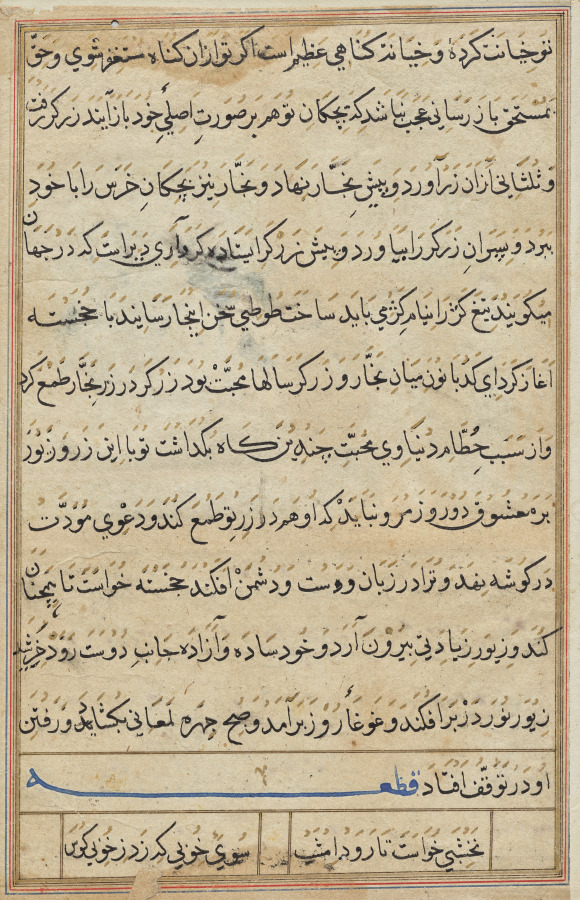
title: Page from Tales of a Parrot (Tuti-nama): text page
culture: Mughal India, court of Akbar (reigned 1556–1605)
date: c. 1560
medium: gum tempera, ink, and gold on paper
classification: Painting